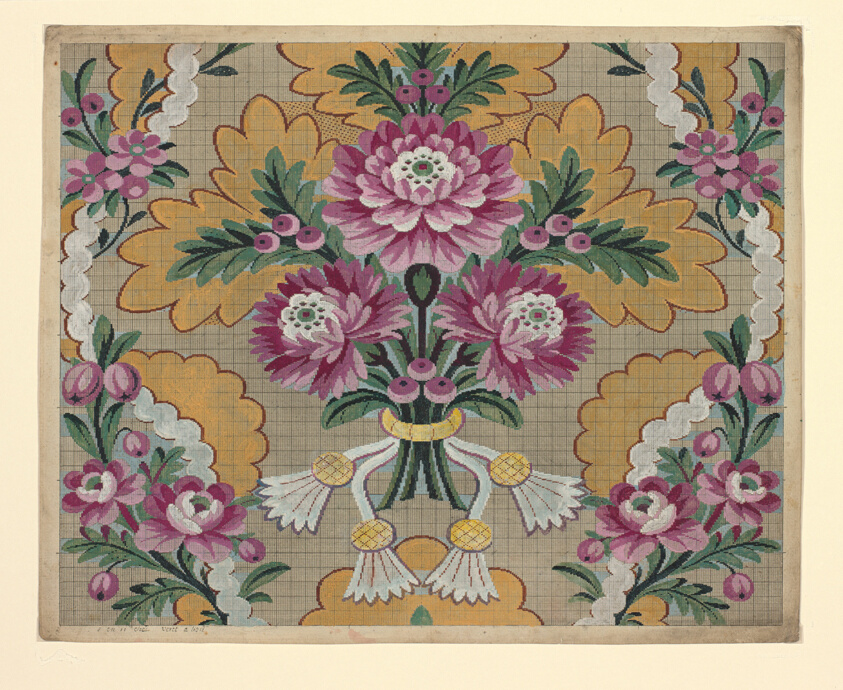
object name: Drawing and Watercolor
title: Mise-en-carte (Point-paper)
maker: France, Lyon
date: 1760/90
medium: Ink and gouache on hand drawn graph paper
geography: France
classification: textile; accessory - paper design